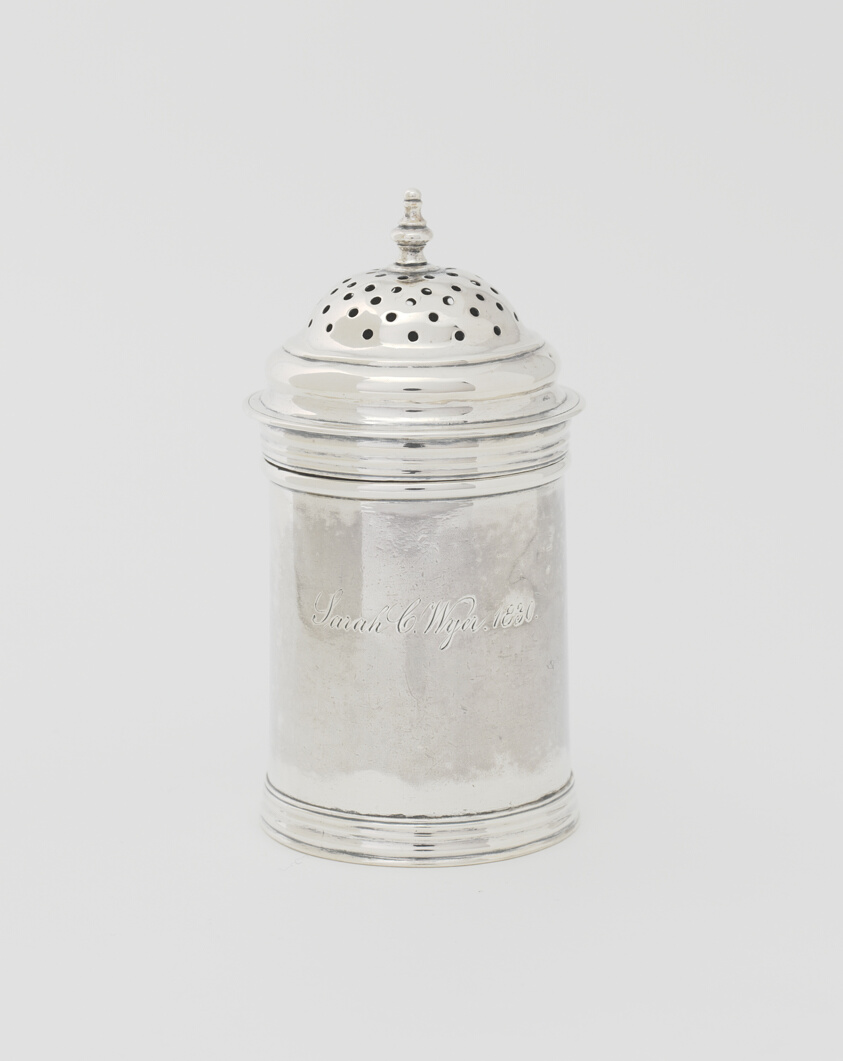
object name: Metalwork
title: Pepper Box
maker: William Cowell, Sr.; American, 1682/83–1736; Boston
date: c. 1720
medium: Silver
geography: Boston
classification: container; box; silver; american decorative arts; american arts; decorative arts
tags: dining, drinking